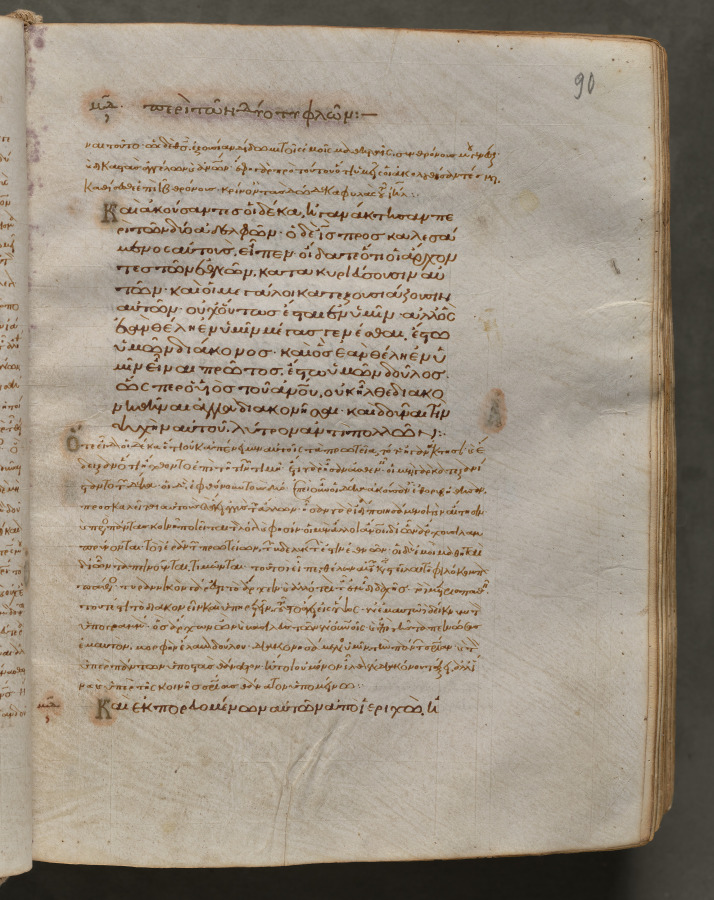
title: Text, folio 90 (recto), from a Gospel Book with Commentaries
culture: Byzantium, Constantinople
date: c. 1000–1100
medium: ink, tempera, and gold on vellum; leather binding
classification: Bound Volume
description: Each of the four gospels in this book opens on a page with brilliantly illuminated borders depicting the author of the text as well as birds-principally peacocks, symbols of the immortality of the soul-and fountains, representing the fountain of life and the salvation of the soul. This volume consists of 428 leaves with texts in Greek. Its level of sophistication suggests that it was probably written and decorated in a monastery in Constantinople.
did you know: Gospel Books were carried in procession through Byzantine churches.